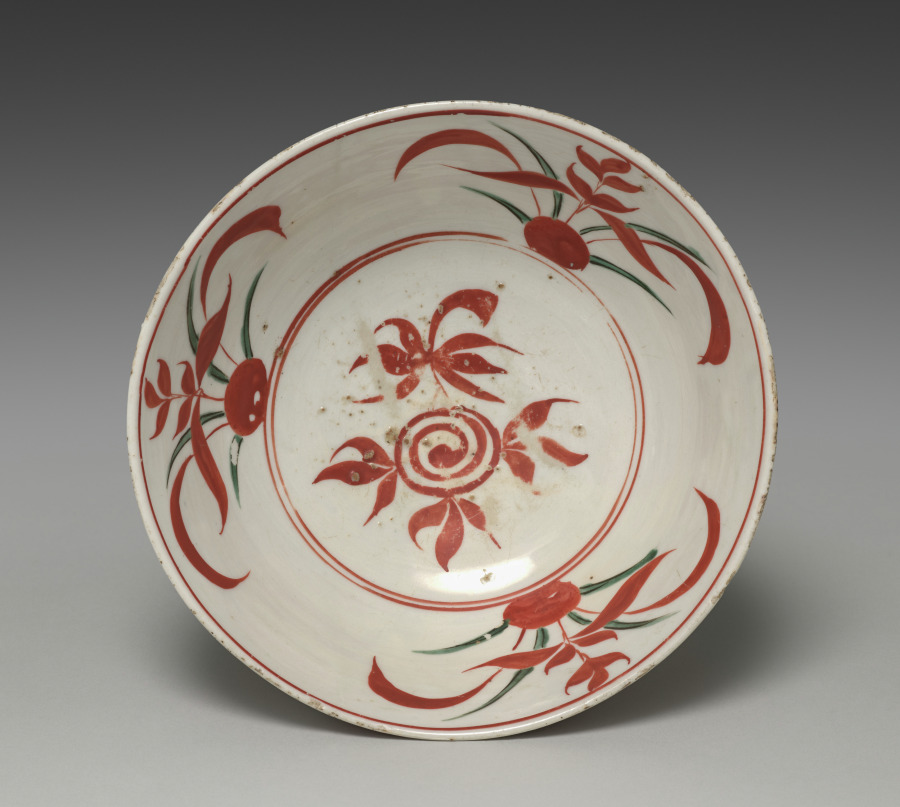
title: Bowl with Auspicious Ideographs and Floral Motifs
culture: China, Ming dynasty (1368–1644)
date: 1600s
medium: Stoneware with overglaze color enamels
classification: Ceramic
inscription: 長,命,富,貴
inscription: 【印】清風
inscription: 【印】大日本清風造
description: As part of their work, members of the Seifu studio, and Seifū Yohei III (三代清風与平, Japanese, 1851–1914), in particular, engaged in the viewing and appreciation of Chinese ceramics. While they were not authenticators, they would have been familiar with imported examples of Chinese stoneware and porcelain through tea gatherings, meetings with their elite clients, exhibitions, and other opportunities to see and study actual pieces from the mainland. This object and its box may be a reflection of Yohei III’s experiences of this kind. The bowl itself is slightly misshapen and roughly glazed with overglaze color enamels in red and green. Flanked by floral motifs, four Chinese characters brushed in red appear in roundels: 長命富貴. Meaning, respectively, longevity, life, prosperity, and status, they are pronounced together in Japanese as the phrase chōmeifūki, or “live long and prosper.” Additional loosely painted foliate designs in red and green circle the area above the foot and inside of the bowl. It is a relatively simple piece made by someone who was likely capable of much finer, more precise work but who could also do completely passable wares on short order. Of greater interest is the storage box lid for this piece. It has an inscription by Yohei III, with his seal, declaring it to be a “sweets dish from southern China with color images.” On the reverse of the lid, Yohei has written his name and placed his Imperial Household Artist seal, but instead of writing “made by,” he wrote “saw this [ceramic].” To the left of this is another inscription in a different hand, stating that the piece is a work from southern China with red-painted designs, produced at the very end of the Ming dynasty. It is signed “Kushi Takushin 久志卓真," along with his seal. Kushi Takushin (1898–1973) was a Japanese musician and music critic, as well as an antiques researcher and authenticator. He was especially interested in Ming dynasty Chinese ceramics and wrote extensively on Chinese, Japanese, and Korean ceramics. Originally from Hokkaido, he was active in Kyoto and began collecting art at a young age. Both he and Yohei appreciated and commented upon the bowl, and perhaps they both owned it.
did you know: Each roundel contains an auspicious word conveying good wishes for a long life and wealth.